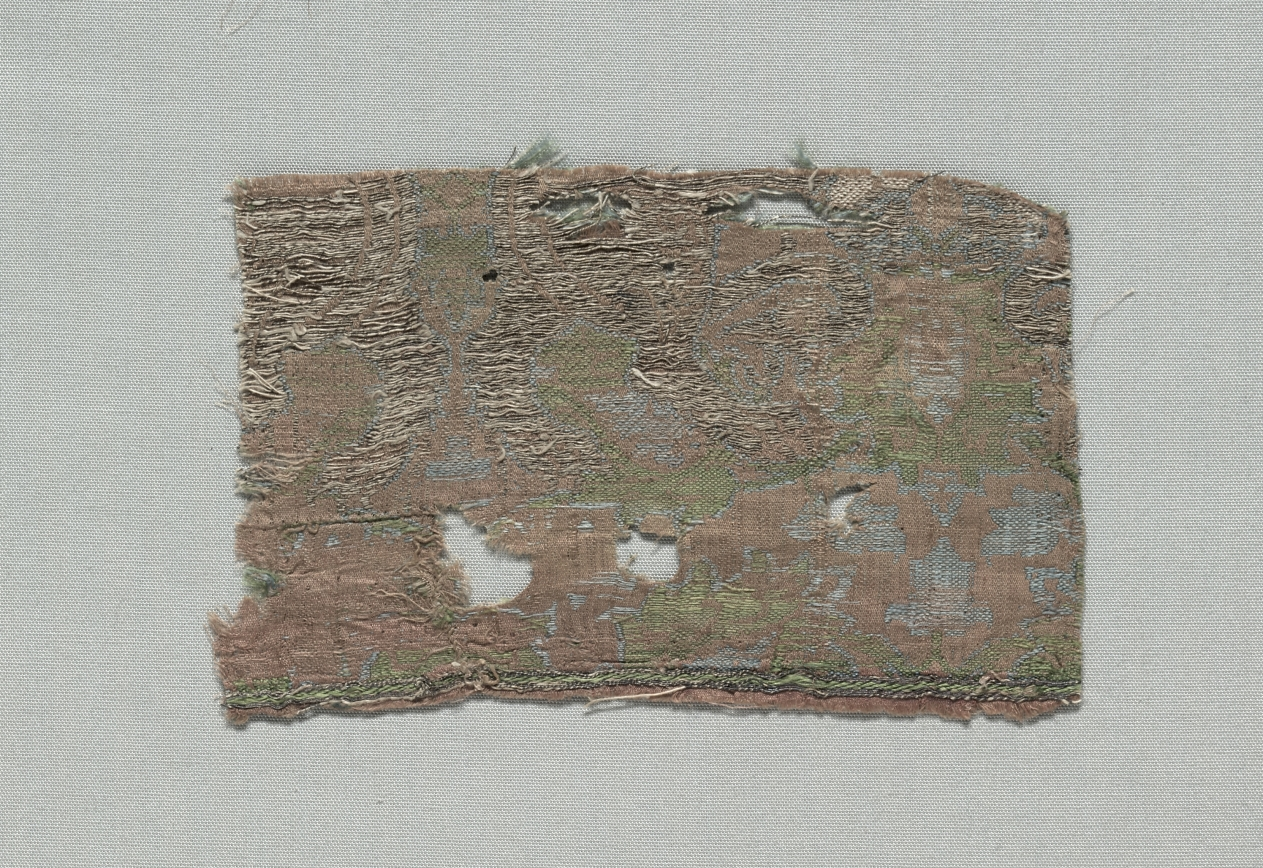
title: Three Fragments of Italian Gothic Silk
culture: Italy, second half of 14th century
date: 1350–1399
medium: lampas weave, brocaded; silk and gold thread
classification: Textile